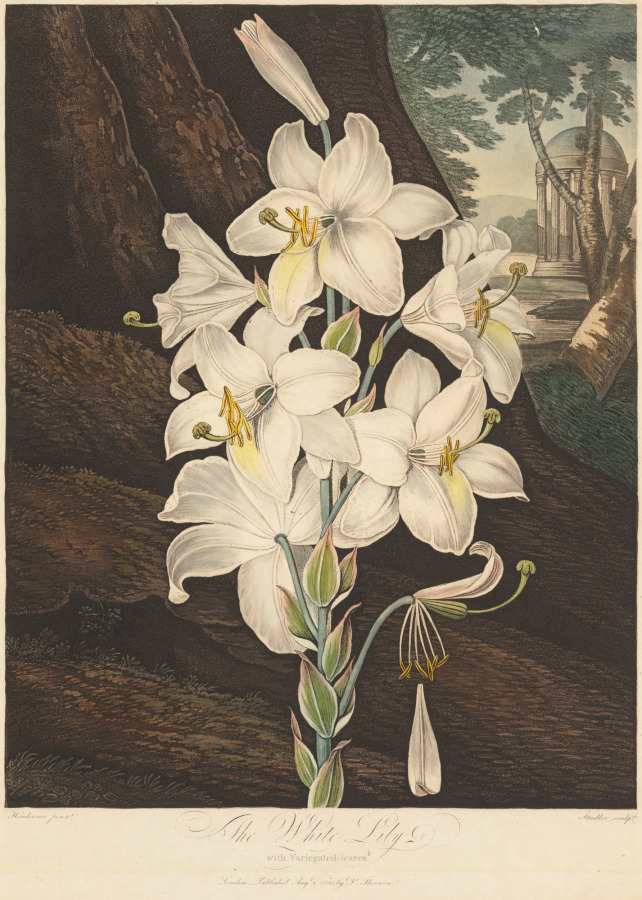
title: The Temple of Flora; or Garden of Nature: White Lily with Variegated Leaves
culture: England, Late 18th- Early 19th century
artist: Joseph Constantine Stadler (German, active 1780–1822)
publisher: Robert John Thornton (British, 1768–1837)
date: published August 1, 1800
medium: Color etching and aquatint hand-colored with watercolor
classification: Print